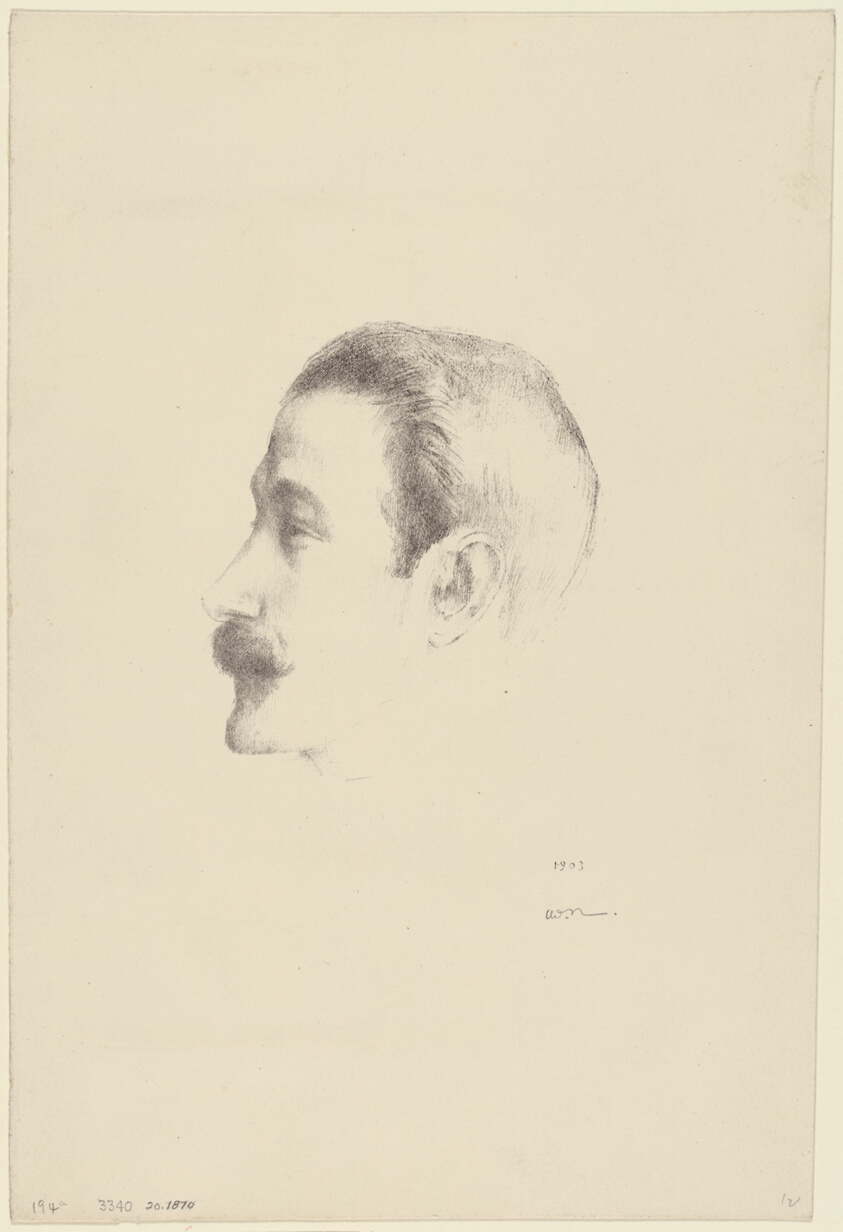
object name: Print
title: Ricardo Viñes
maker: Odilon Redon (French, 1840-1916)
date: 1903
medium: Lithograph in black on heavy cream wove paper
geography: France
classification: lithograph; print; prints and drawing; paper